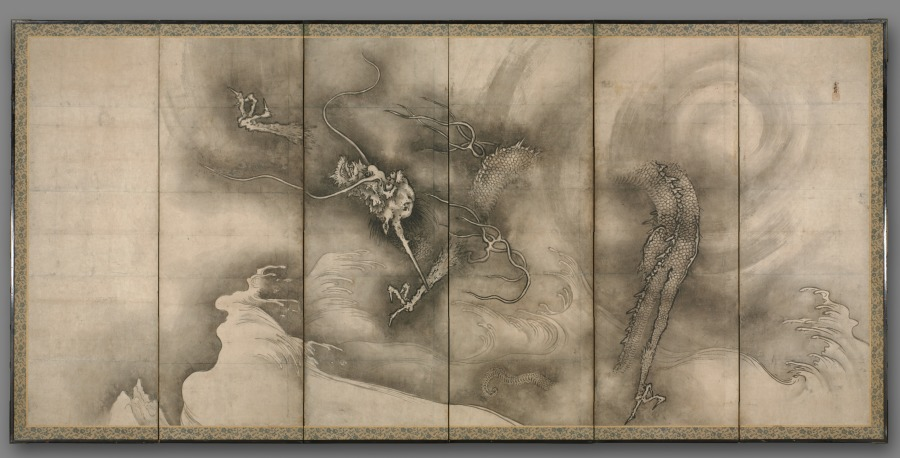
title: Dragon and Tiger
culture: Japan, Muromachi period (1392–1573) to Momoyama period (1573–1615)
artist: Sesson Shūkei (Japanese, c. 1492–c. 1577)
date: c. 1546–56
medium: Pair of six-panel folding screens; ink on paper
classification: Painting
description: A tiger sits in a bamboo grove whipped with fierce wind, while a dragon claws through clouds above rough waves. Tiger and dragon are Chinese cosmological symbols of the balancing forces in the world, yin (the feminine aspect) and yang (the masculine aspect). The tiger's roar is also said to generate wind, and the dragon clouds. The screens may have originally been meant to express the fluctuating nature of the world as envisioned in the practice of military divination, or forecasting, based on the Yijing (Book of Changes).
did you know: This pair of screens is considered the masterpiece of Sesson's body of work, and may have been created for the lord of Odawara in eastern Japan.